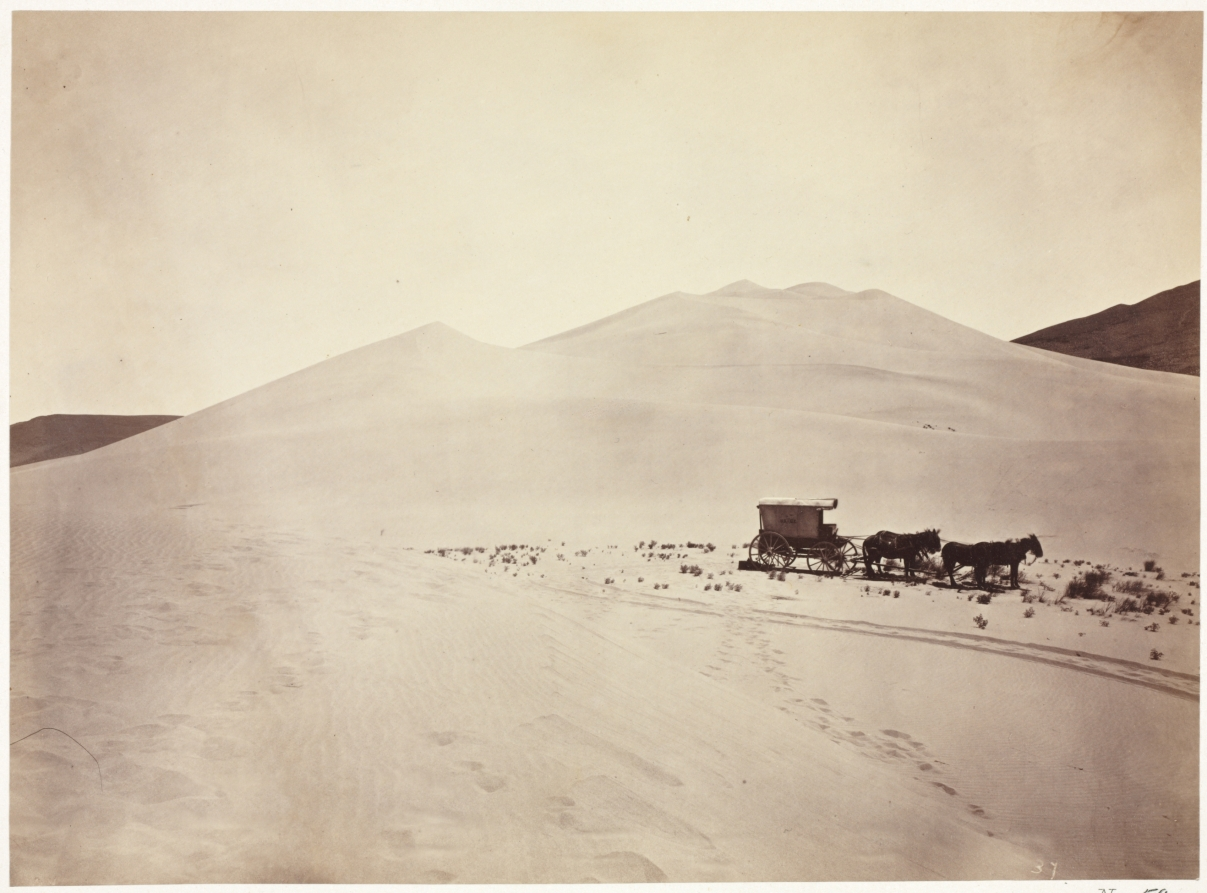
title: Sand Dunes, Carson Desert, Nevada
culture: America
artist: Timothy H. O'Sullivan (American, 1840–1882)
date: 1867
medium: albumen print from wet collodion negative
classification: Photograph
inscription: imprinted in black ink on recto: "U.S./ ENGINEER DEPARTMENT/ GEOLOGICAL EXPLORATION/ FORTIETH PARALLEL"; "T.H.O'Sullivan Photographer"; "No. 59" (highlighted in black)"; in black ink on mount: "Sand Dunes near Sand"; in pencil on mount: "K1130"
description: This noontime scene conveys a desolate place discovered by a lonely explorer. The artist chose a vantage point and framing that blocked the horizon and showed a single wagon—the former Civil War ambulance that he converted into a portable darkroom—and only two sets of footprints. However, over the previous 25 years, more than 165,000 people had passed near here on their way to California.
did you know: O’Sullivan took this while on a government expedition analyzing the future path of the transcontinental railroad.